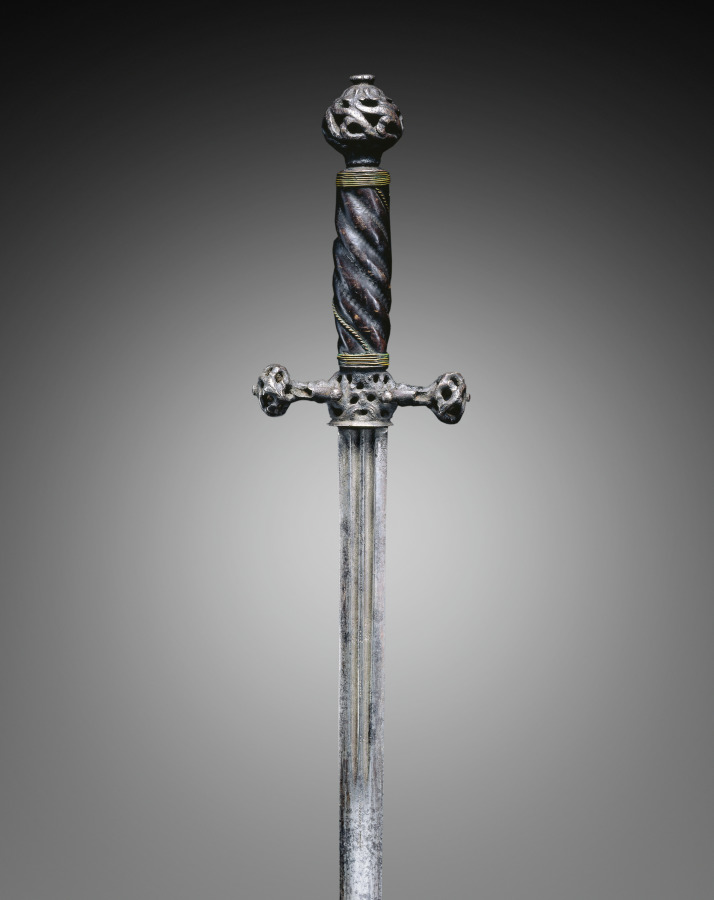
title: Pillow Sword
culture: Italy, 17th century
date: c. 1650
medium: steel, pierced; leather and wood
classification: Arms and Armor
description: The "pillow-sword" is so-named because of where it was kept. A sword like this one, with a straight blade and relatively simple hilt, would have been suspended above a headboard within arm's reach for bedside defense should an intruder attack while the household was asleep and vulnerable.